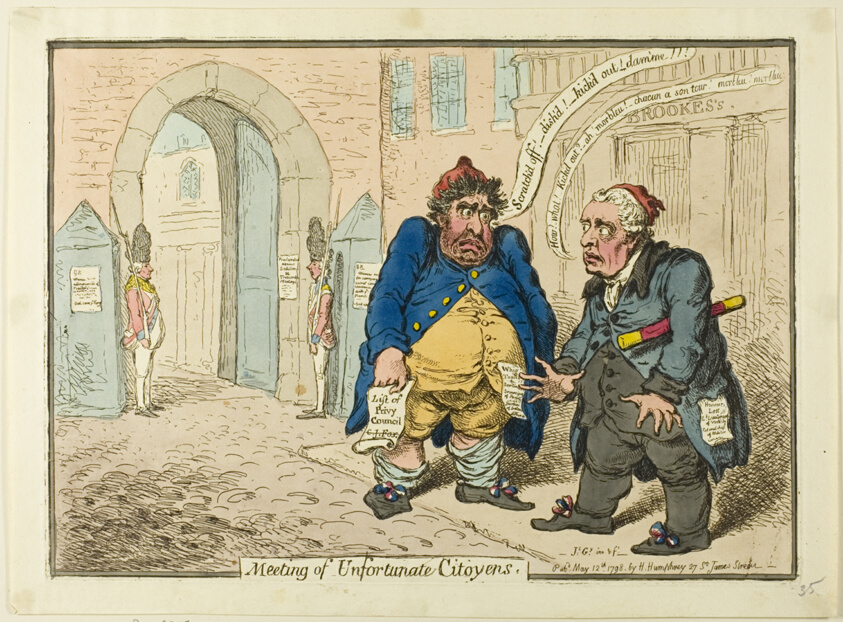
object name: Print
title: Meeting of Unfortunate Citoyen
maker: James Gillray (English, 1756-1815); published by Hannah Humphrey (English, c. 1745-1818)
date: published May 12, 1798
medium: Hand-colored etching on paper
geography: England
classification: etching; print; prints and drawing